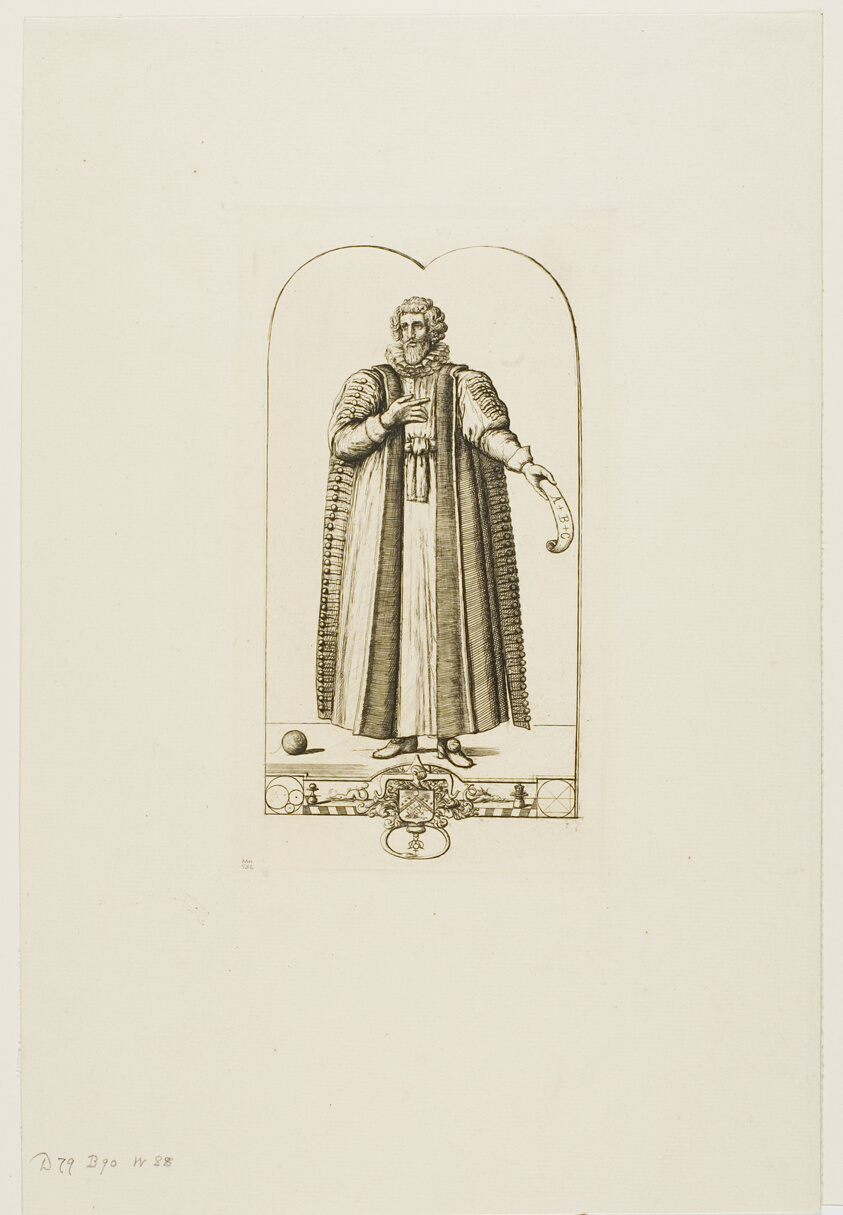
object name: Print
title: Portrait of François Viète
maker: Charles Meryon (French, 1821-1868); after Daniel Rabel (French, c.1578-1637)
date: 1861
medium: Etching on ivory laid paper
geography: France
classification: etching; print; prints and drawing